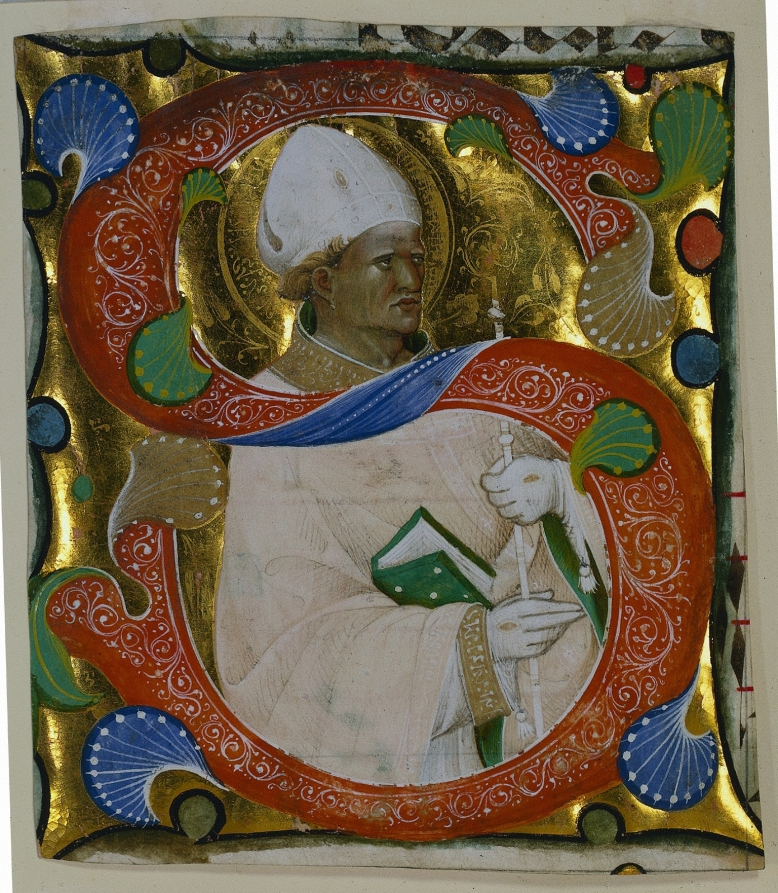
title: Initial S from a Gradual: Saint Augustine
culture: Italy, Venice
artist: Master of the Murano Gradual (Italian)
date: c. 1420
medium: ink, tempera, and gold on vellum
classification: Manuscript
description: This initial belongs to a large group of excised miniatures of saints once part of a gradual used in a Venetian Camaldolese monastery, probably San Michele on the island of Murano. The artist has shown a fondness here for unusual decorative features such as the band of pseudo-Arabic writing along the sleeve and the feathery-white scrolling leaves resembling shells.